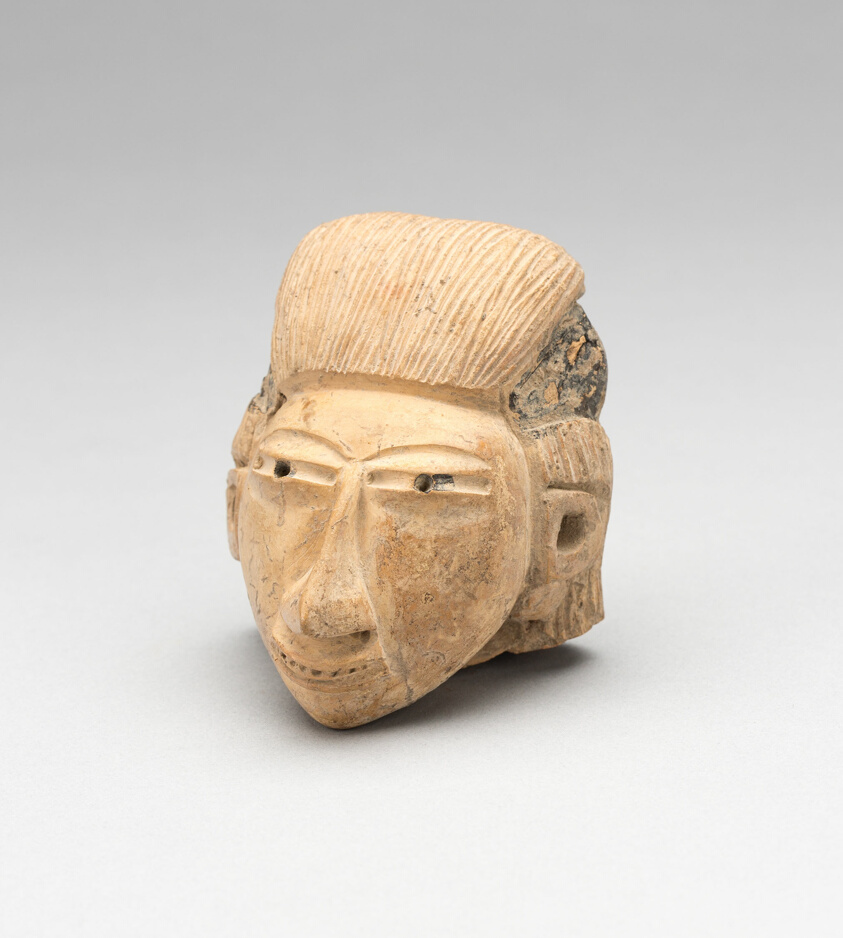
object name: Sculpture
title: Head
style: huastec, americas, Arts of the Americas, mesoamerican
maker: Huaxtec; Veracruz, Mexico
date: 800–1400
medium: Ceramic and pigment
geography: Veracruz state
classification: earthenware; art of the americas; ceramics; sculpture